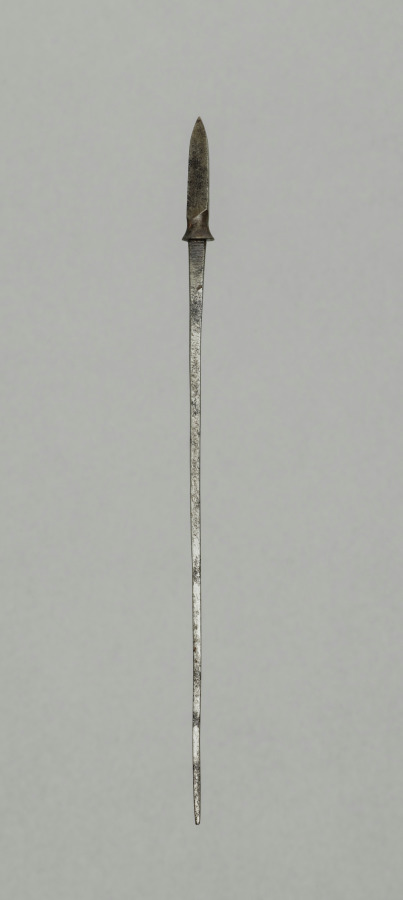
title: Arrow Point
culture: Japan, Edo period (1615–1868)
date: 1700s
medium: steel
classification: Arms and Armor